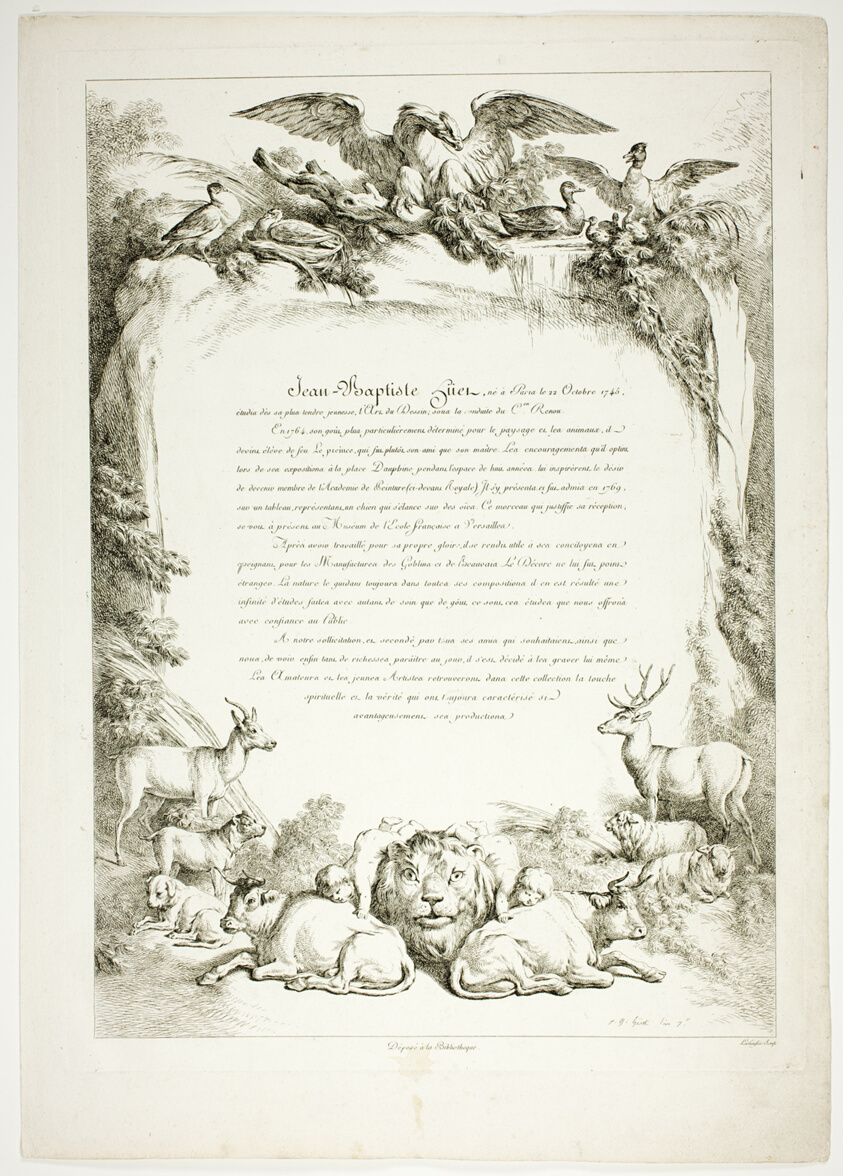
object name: Print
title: Biography Page from Oeuvres de J. B. Huet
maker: Jean Baptiste Huet (French, 1745-1811)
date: 1796–99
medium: Etching on paper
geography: France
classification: etching; print; prints and drawing